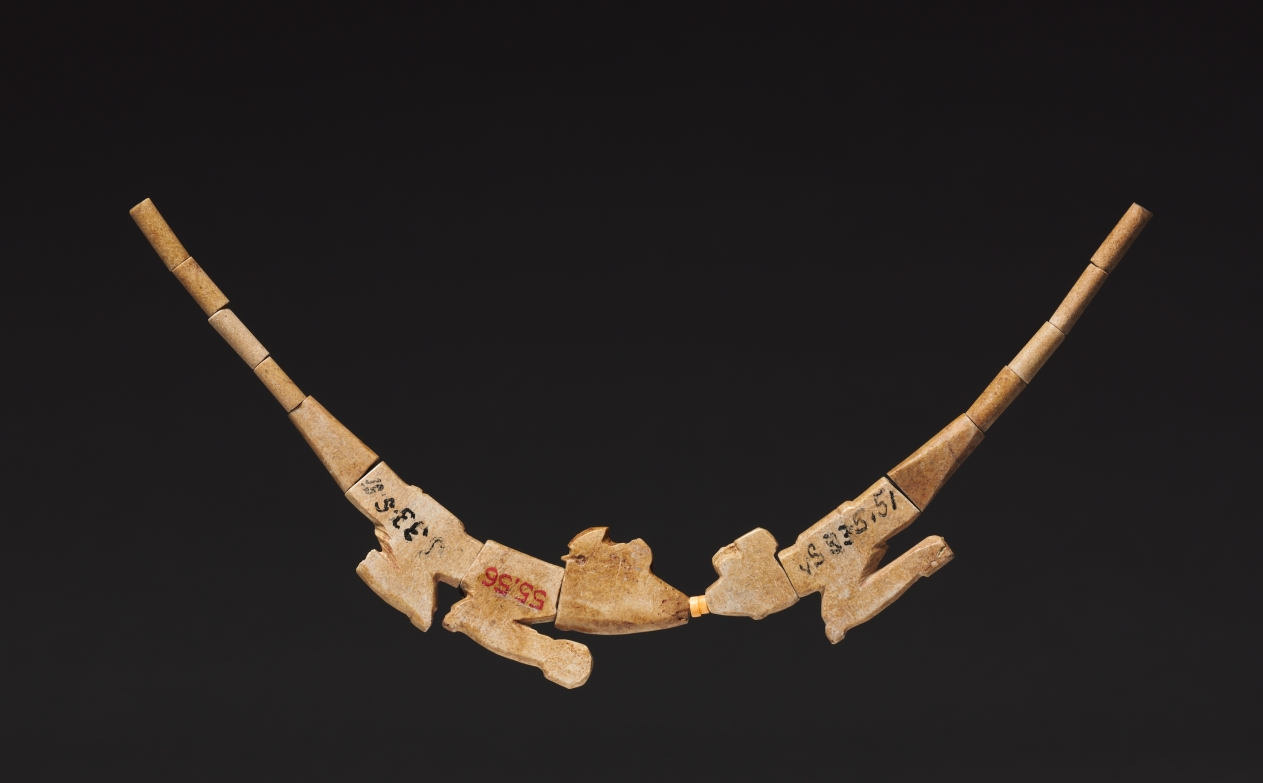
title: Necklace with Lizards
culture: Peru, Moche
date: 550–800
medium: stone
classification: Jewelry